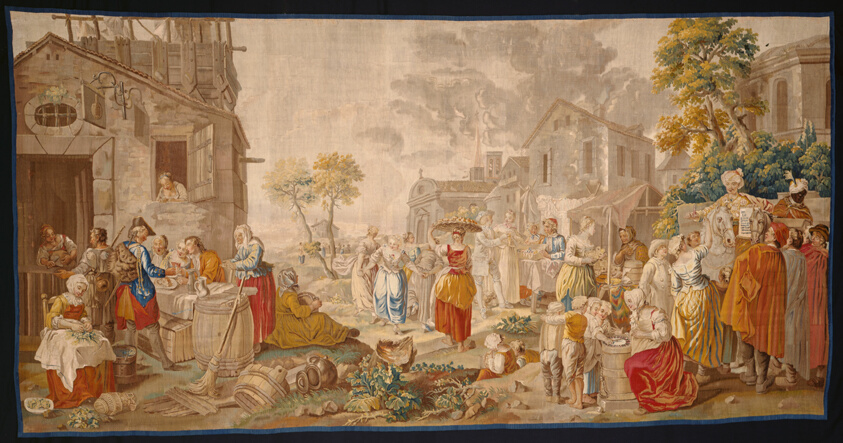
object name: Textile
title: The Outdoor Market, from Village Festivals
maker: After a design by Étienne Jeaurat (1699–1789); Woven at the workshop of Léonard Roby (active c. 1750–1789); France, Aubusson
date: 1775/89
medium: Wool and silk, slit and double interlocking tapestry weave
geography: France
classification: weaving - tapestry; textile